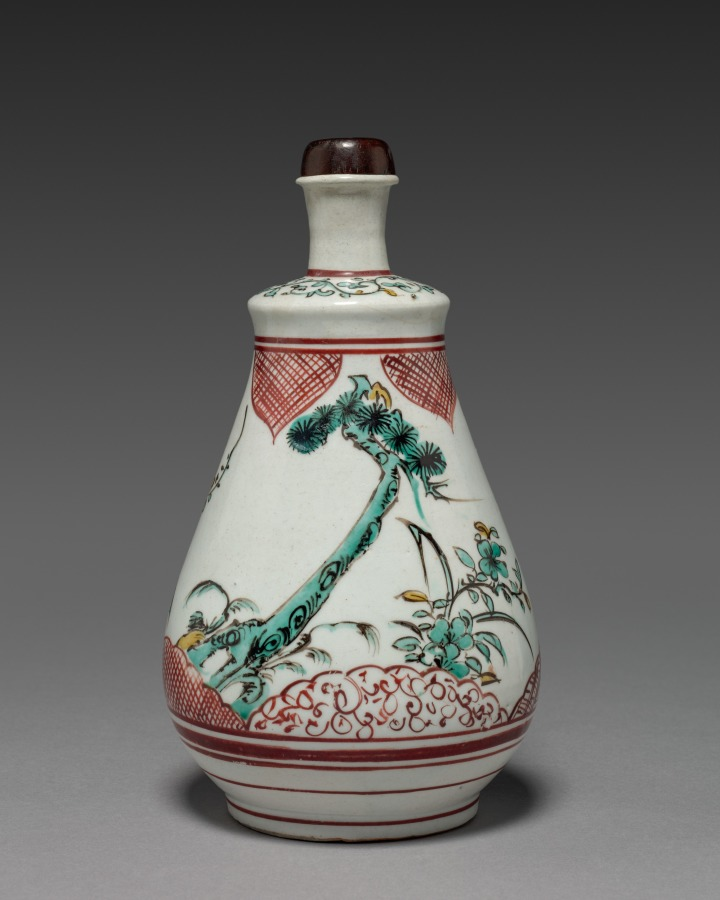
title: Wine Bottle with Plum and Pine Tree Design: Ko Imari Type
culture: Japan, Edo period (1615–1868)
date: late 1600s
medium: porcelain with underglaze enamel decoration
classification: Ceramic